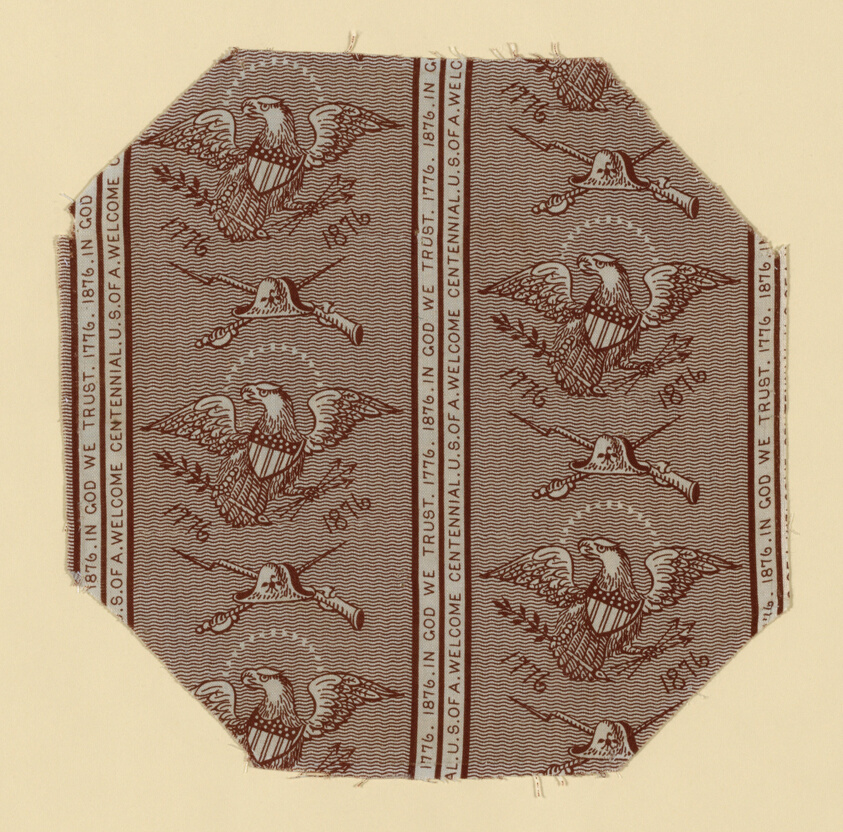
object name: Textile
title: Fragment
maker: United States or England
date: 19th century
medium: Cotton, plain weave; printed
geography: United States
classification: textile; weaving - printed; furnishing textile